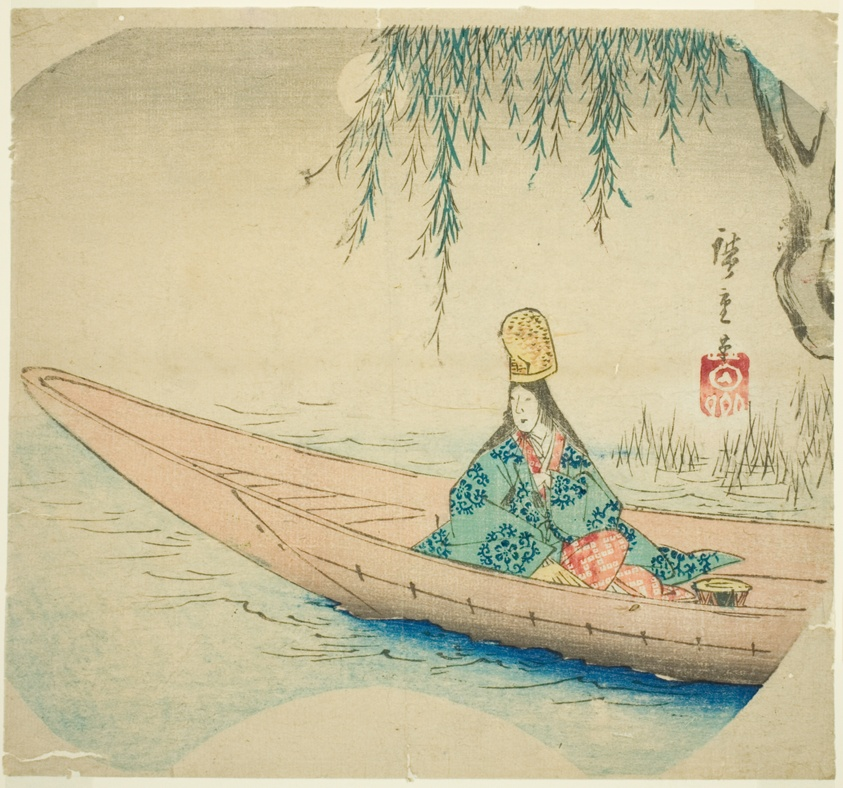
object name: Print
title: Shirabyoshi dancer in asazuma boat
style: Japanese (culture or style)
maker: Utagawa Hiroshige 歌川 広重; Japanese, 1797-1858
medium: Color woodblock print; uchiwa-e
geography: Japan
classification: woodblock print; print; asian art